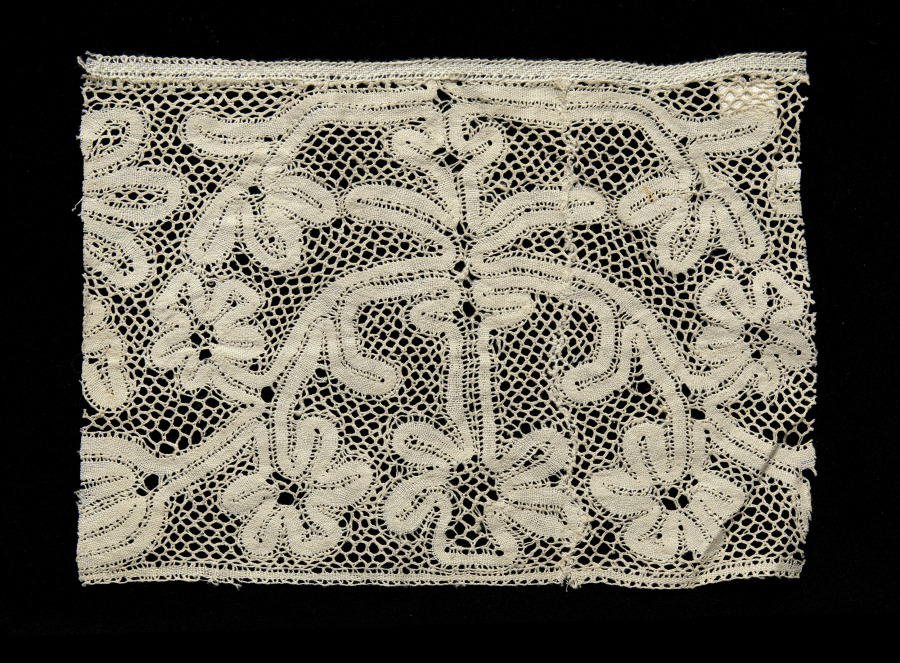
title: Lace Edging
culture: Italy, Abruzzi, Pescocostanzo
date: 1700s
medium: Linen: bobbin lace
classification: Lace